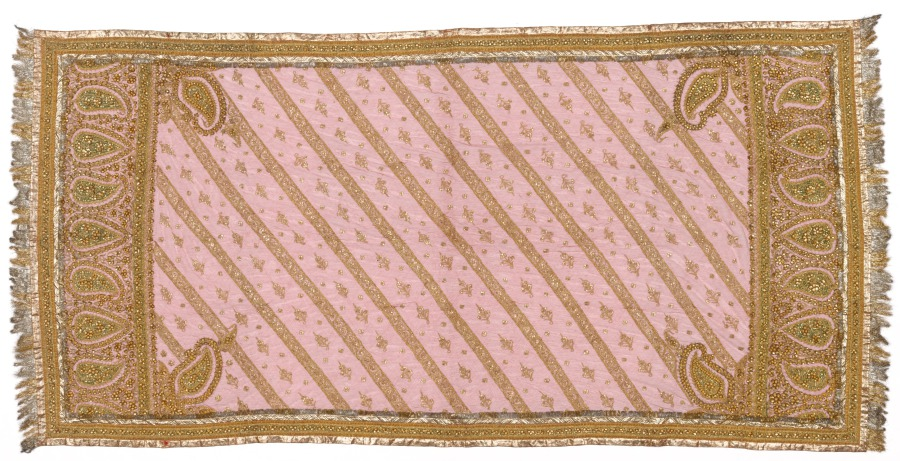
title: Metal Embroidery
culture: India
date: early 1900s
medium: Silk net with metal thread, embroidery and sequins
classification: Embroidery